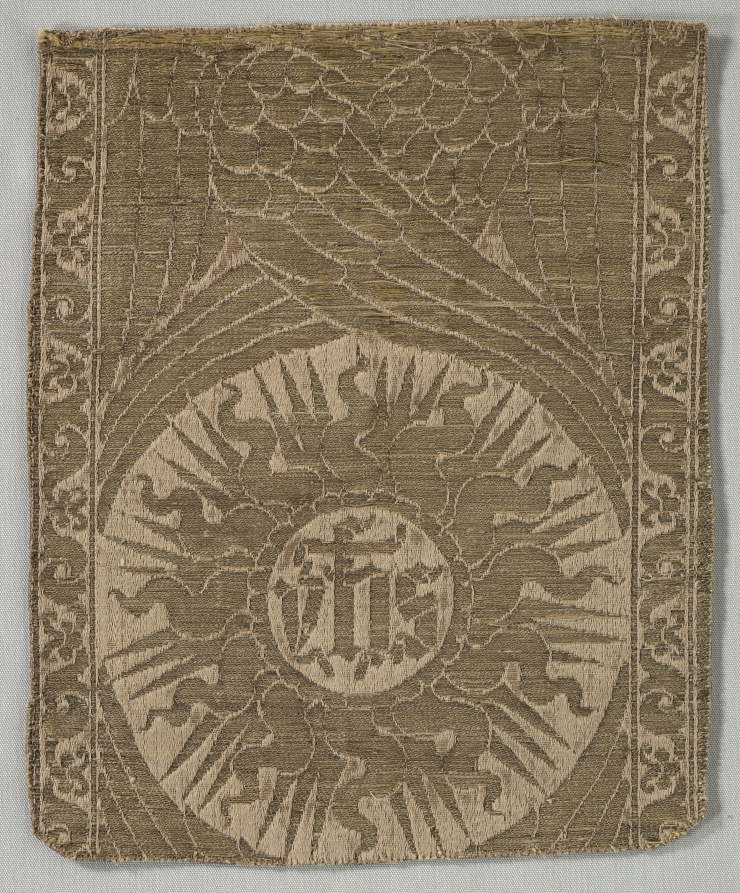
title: Fragment of an Orphrey Band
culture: Italy, early 16th century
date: early 1500s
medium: lampas weave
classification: Textile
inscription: "I H S."